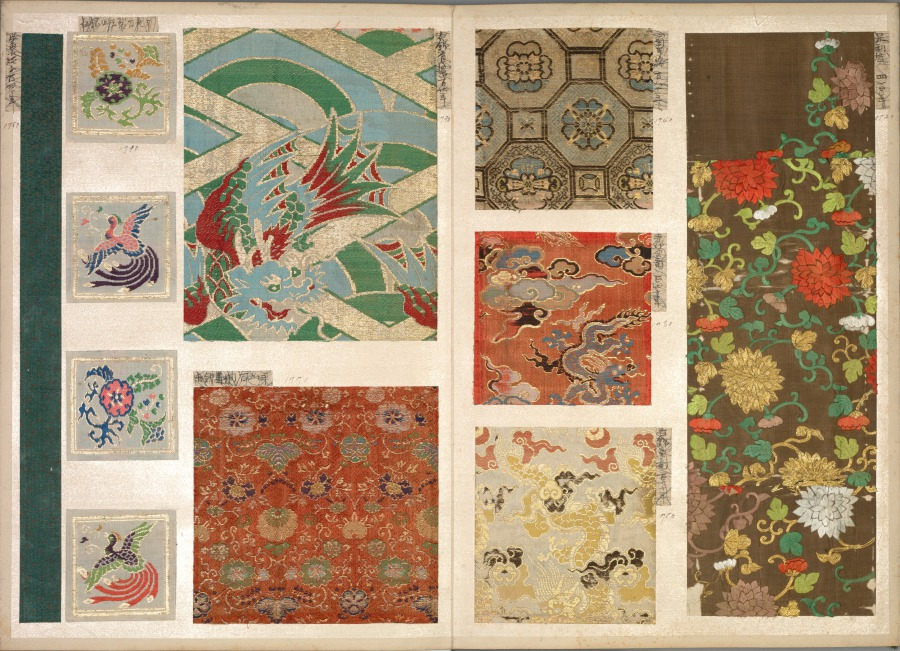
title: Album of Textile Samples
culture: Japan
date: 1790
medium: silk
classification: Textile